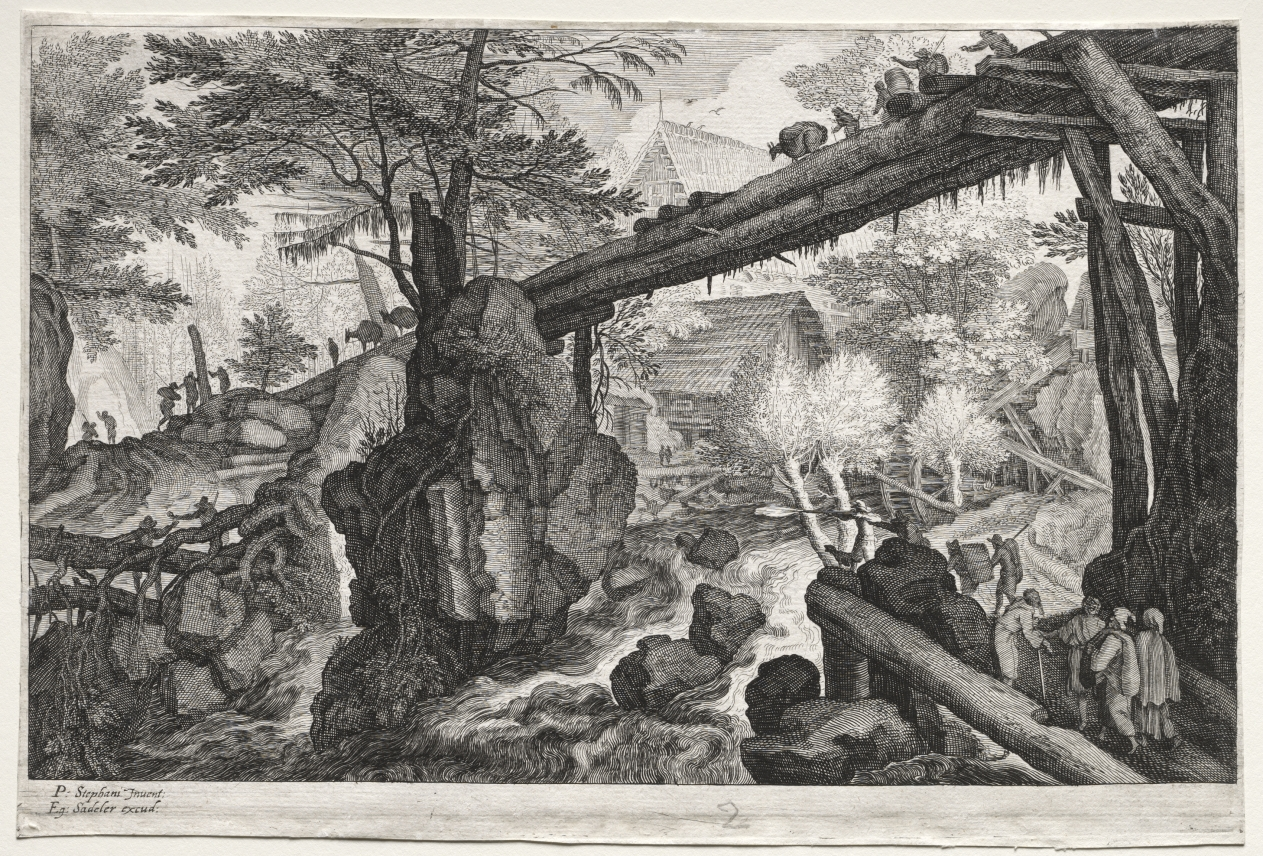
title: Eight Bohemian Landscapes: Landscape with Log Bridge over Cataract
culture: Flanders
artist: Aegidius Sadeler (Flemish, c. 1570–1629)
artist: after Pieter II Stevens (Flemish, c. 1567–after 1624)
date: c. 1610–15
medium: engraving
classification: Print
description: The dramatic forest interior, ornamental foliage, and diminutive figures in this engraving are all hallmarks of the imaginary landscape tradition brought by Flemish immigrants to the northern Netherlands at the turn of the 17th-century. Pieter Stevens (about 1567-after 1624), the designer of the print, worked in Antwerp until 1594, when he was named court painter to Emperor Rudolf II in Prague. While in Rudolf's employ, Aegidius Sadeler engraved a number of his drawings, such as this work. Enormous trees rise above a scene of peasants and mules who cross a manmade bridge to reach a distant mill. In the foreground corner, a group of figures stand along the rocky river bank while a man fires a flintlock across the river.